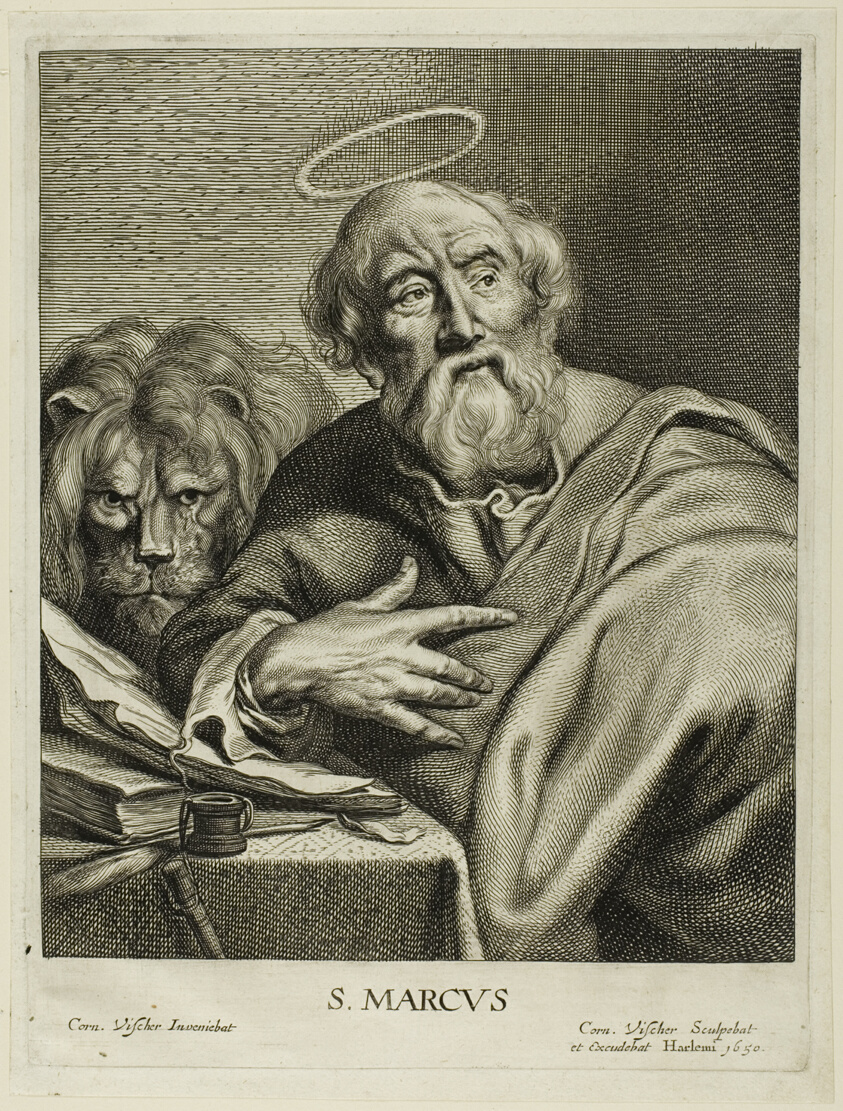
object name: Print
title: Saint Mark, from The Four Evangelists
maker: Cornelis Visscher (Dutch, c. 1629-1658)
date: 1650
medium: Engraving on ivory paper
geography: Holland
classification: engraving; print; prints and drawing